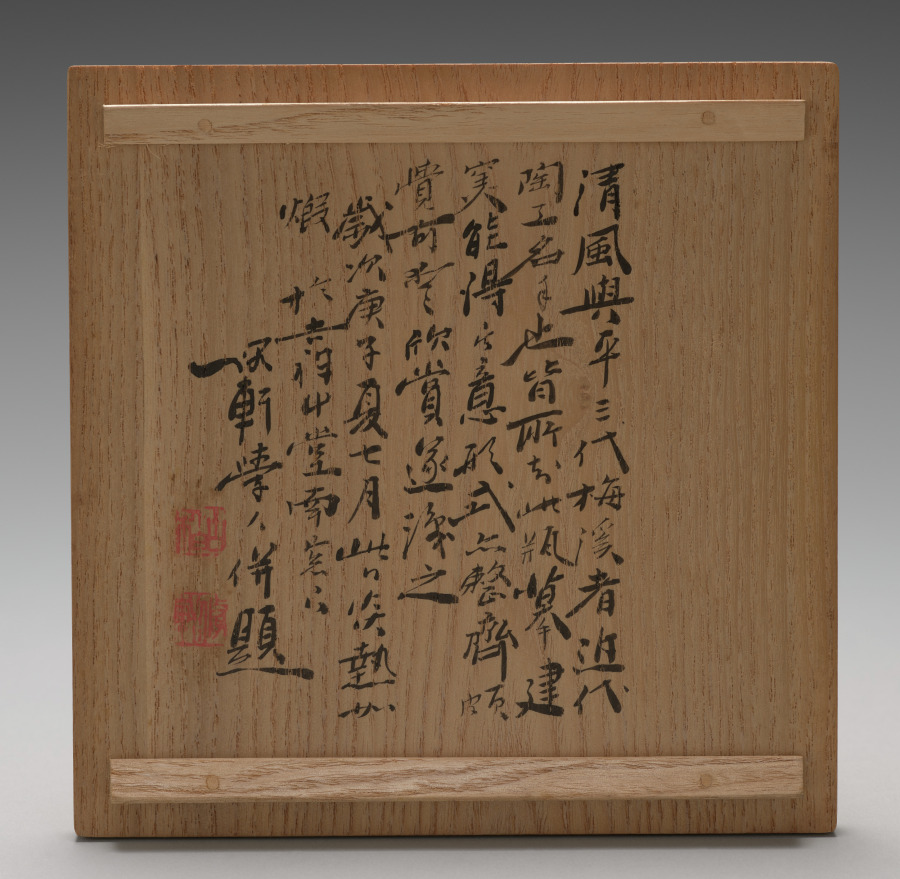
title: Teapot with Ruyi Motifs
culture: Japan, Meiji period (1868–1912)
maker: Seifū Yohei III (Japanese, 1851–1914)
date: 1893–1914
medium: Porcelain with molded design and iron handles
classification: Ceramic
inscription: The base of the pot has a “Seifu” seal.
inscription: Inscription on the box dated to 1960.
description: The simple, round form of this teapot is embellished with only a pair of nyoi staff-head motifs, one on each side. Two arched iron handles, parallel to each other, are hooked through holes in raised tabs at the front and back of the shoulders of the pot. The round lid is depressed so that an iron ring handle fastened with an iron clamp passing through the lid can lie flat inside the recessed area. The box is not original to the piece and has an inscription dated to 1960. The person who wrote it clearly admired Yohei III and his efforts to produce works that resembled Chinese ceramics. The inscription describes Yohei’s journey to perfecting these copies but misidentified the Chinese kiln whose wares were the basis for this particular work.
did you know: The base of the pot has a “Seifu” seal.